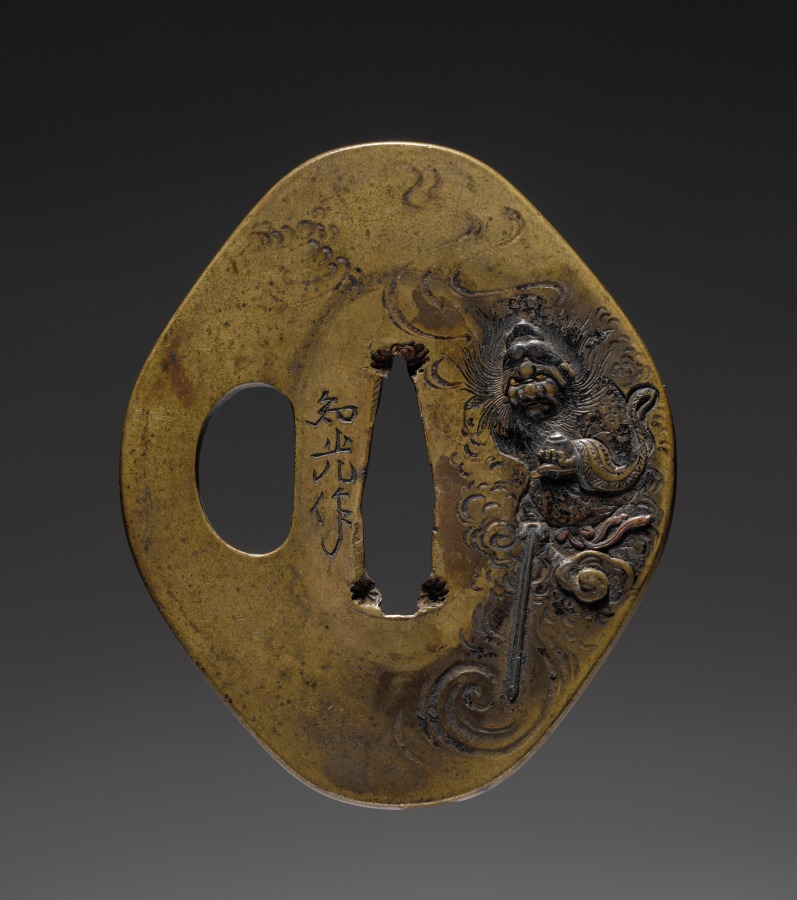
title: Sword Guard (Tsuba) with Zhong Kui (Shoki) the Demon Queller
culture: Japan, Edo period (1615–1868)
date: early 1800s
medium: iron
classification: Arms and Armor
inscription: signed: 知充作